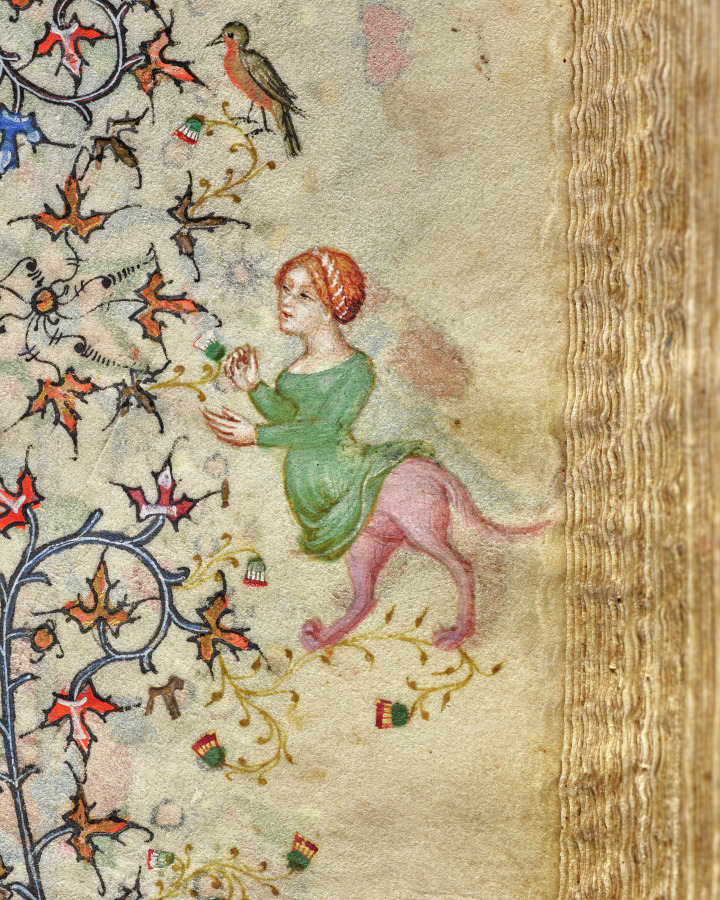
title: Hours of Charles the Noble, King of Navarre (1361-1425): fol. 267r, St. Bartholomew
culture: France, Paris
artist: Master of the Brussels Initials and Associates (French)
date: c. 1405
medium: ink, tempera, and gold on vellum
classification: Bound Volume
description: This precious volume was obviously highly prized by its owner, the French-born King of Navarre, who had his coat of arms painted on no less than twenty folios. Rather than directly commissioning this manuscript from a specific workshop, it seems that Charles the Noble acquired his book of hours -- perhaps ready-made for the luxury market -- while on a trip to Paris in 1404-05. A collaborative effort, six painting styles are evidenced within the pages of this codex, those of two Italians, two Frenchmen, and two Netherlanders. The painter who was responsible for the planning and decoration of the book, and who produced seventeen of the large miniatures, was a Bolognese artist known as the Master of the Brussels Initials. His principal assistant, responsible for most of the borders, was a Florentine who signed his name "Zecho" da Firenze on folio 208 verso.